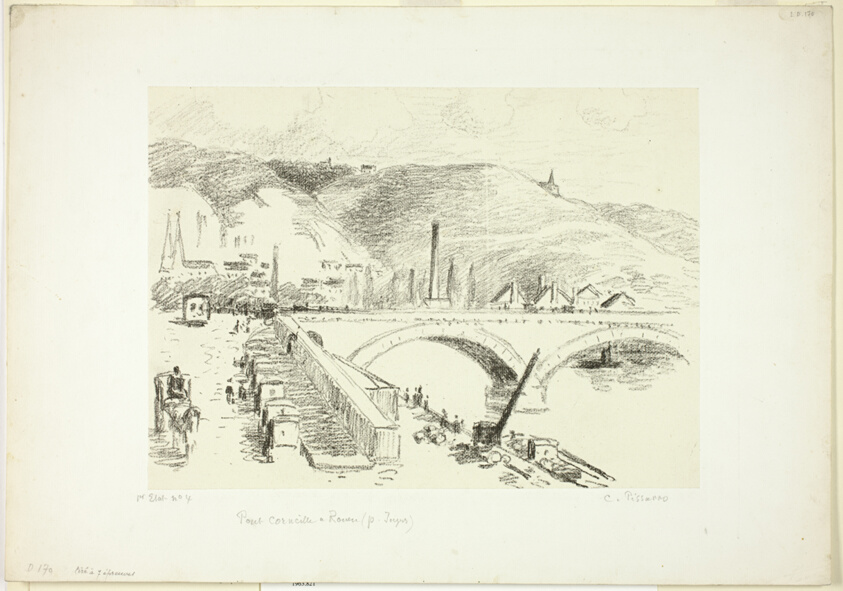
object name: Print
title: Bridge in Rouen: Pont Corneille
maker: Camille Pissarro (French, 1830-1903)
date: 1896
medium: Lithograph in black on cream laid paper, laid down on off-white laid paper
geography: France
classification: lithograph; print; prints and drawing